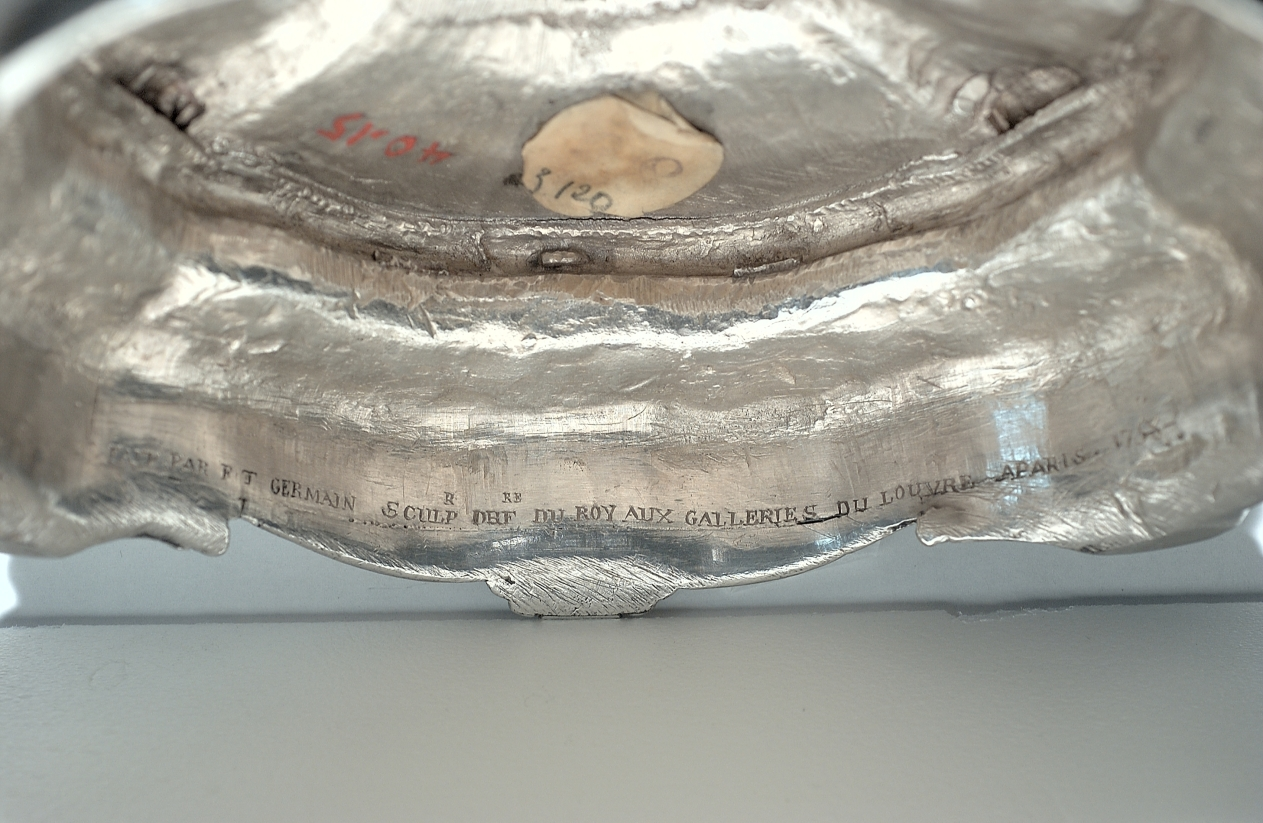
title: Candelabrum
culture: France, Paris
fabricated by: François Thomas Germain (French, 1726–1791)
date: 1757–58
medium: silver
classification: Silver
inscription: [Charge mark of Eloy Brichard , 1756−1762, beneath base]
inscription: [Warden's mark for Paris, 1757-1758, beneath base]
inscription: [Discharge mark for work intended for export, 1756−1775, on base]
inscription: [Hallmarks for Saint Petersburg, on base]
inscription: [Assayer mark of Ivan Frolov, on base]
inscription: [Russian standard of the French silver, on base]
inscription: [Maker’s mark of Francois-Thomas Germain, master silversmith on October 16, 1748, beneath drip pan one each of three bobeches]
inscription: [Charge mark Of Eloy Brichard, 1756−1762, beneath drip pan one each of three bobeches]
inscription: [Discharge mark for work intended for export, 1733 (?)−1775, beneath drip pan one each of three bobeches]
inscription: [Warden's mark for Paris, 1757−1758, beneath drip pan one each of three bobeches]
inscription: [Assayer mark of Ivan Frolov, beneath drip pan of one of three bobeches]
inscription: [Russian standard of French silver, beneath drip pan of one of three bobeches]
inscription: [Charge mark for large work of Eloy Brichard, 1756−1762, on candelabra bayonet attachment]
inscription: [Discharge mark for work intended for export, on candelabra bayonet attachment]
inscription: [Beneath base]: “Fait. Par. F. T. Germain. Sculp[teu]r. Orf[ev]re. Du Roy. Aux. Galleries. Du Louvre. A Paris. 1758”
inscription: [Beneath base]: "Du no.32"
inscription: [Beneath base]: "No 465"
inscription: [Engraved Russian Imperial coat-of-arms, beneath base]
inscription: [Modern inscription in a round paper label, beneath base]: “[?]8” [printed in black]: “3120” [written in pencil]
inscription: [Modern inscription in a rectangular paper label, beneath base]: “…IN/FRANCE” [printed in black]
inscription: [Modern inscription in a rectangular paper label, beneath base]: “46” [written in black ink]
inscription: [Engraved cipher composed with two “M”’s (?) surmounted by a royal crown, on base]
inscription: [Engraved, on base]: "No 465"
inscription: [Engraved, on base]: "du No 32"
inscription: [Engraved cipher composed with two “M”’s (?) surmounted by a royal crown, on one bobeche]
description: This candelabrum is part of a pair. Its design blurs the line between function and decoration. The arms twist and curve, appearing as flower stems while physically supporting the candles. Though this visual unity is typical of the Rococo style, the influence of the rising neoclassical style is evident in the allegorical scenes of light that decorate each candelabra’s stem.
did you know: These candelabra are part of a dinner service sent from Paris, France, to Saint Petersburg, Russia, in two separate shipments, the first of which contained 270 objects for 8 dozen place settings.